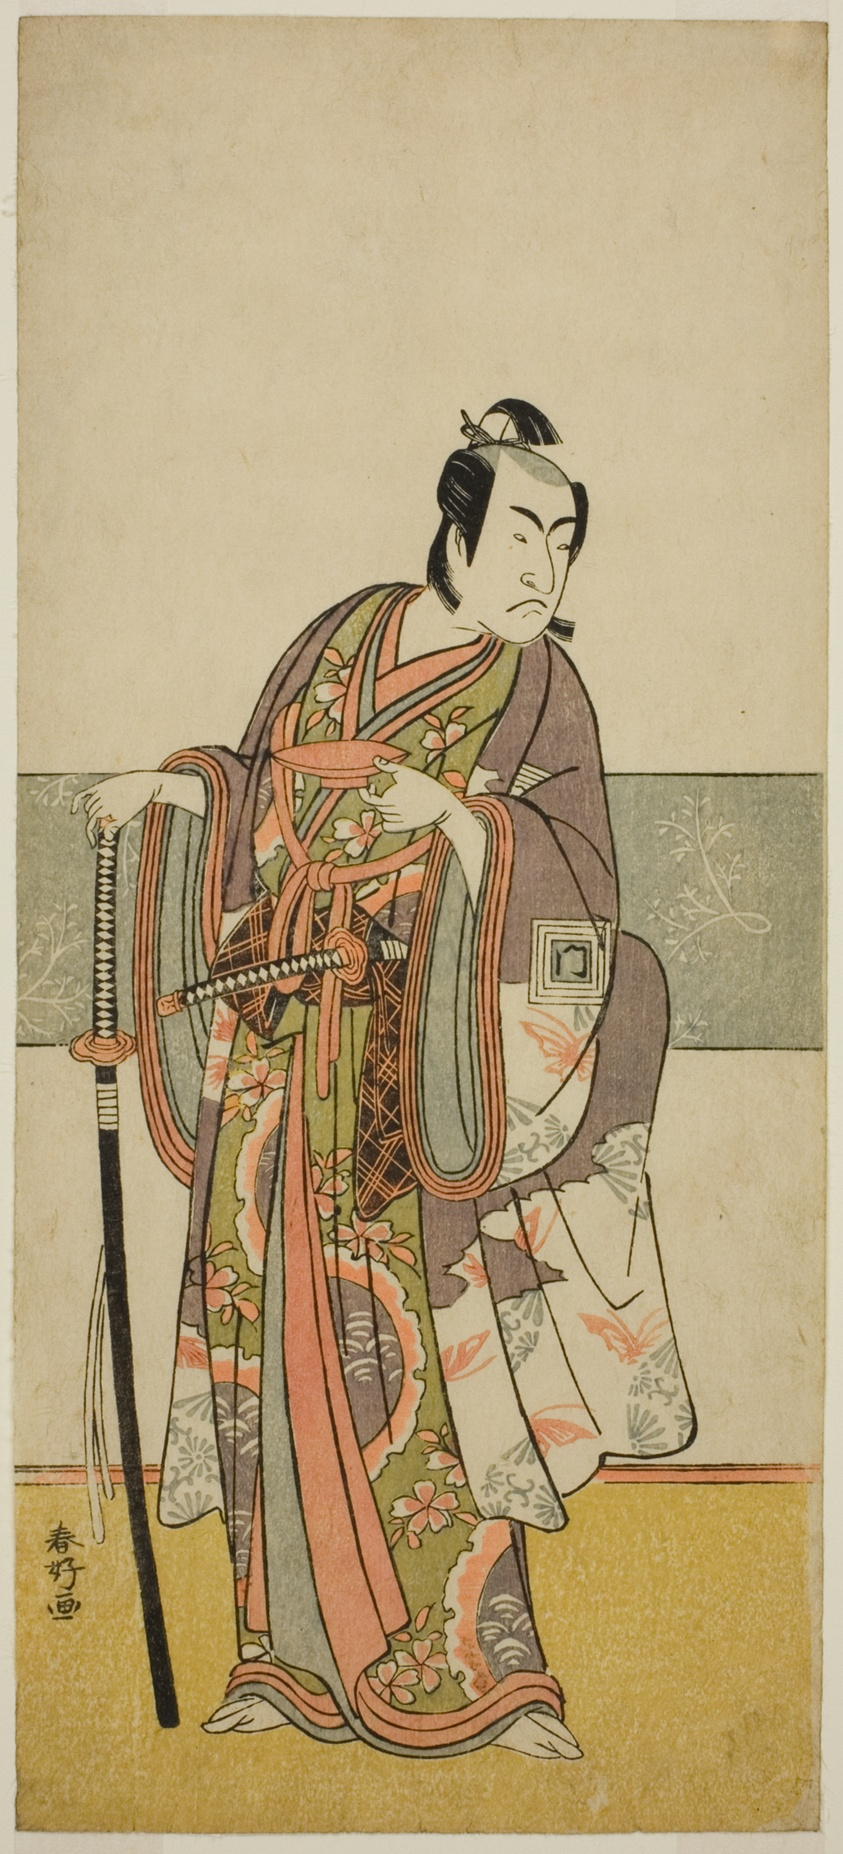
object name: Print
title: The Actor Ichikawa Monnosuke II in an Unidentified Role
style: Japanese (culture or style)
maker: Katsukawa Shunko I; Japanese, 1743-1812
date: c. 1778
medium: Color woodblock print; hosoban; from a multisheet composition (?)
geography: Japan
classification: woodblock print; print; asian art